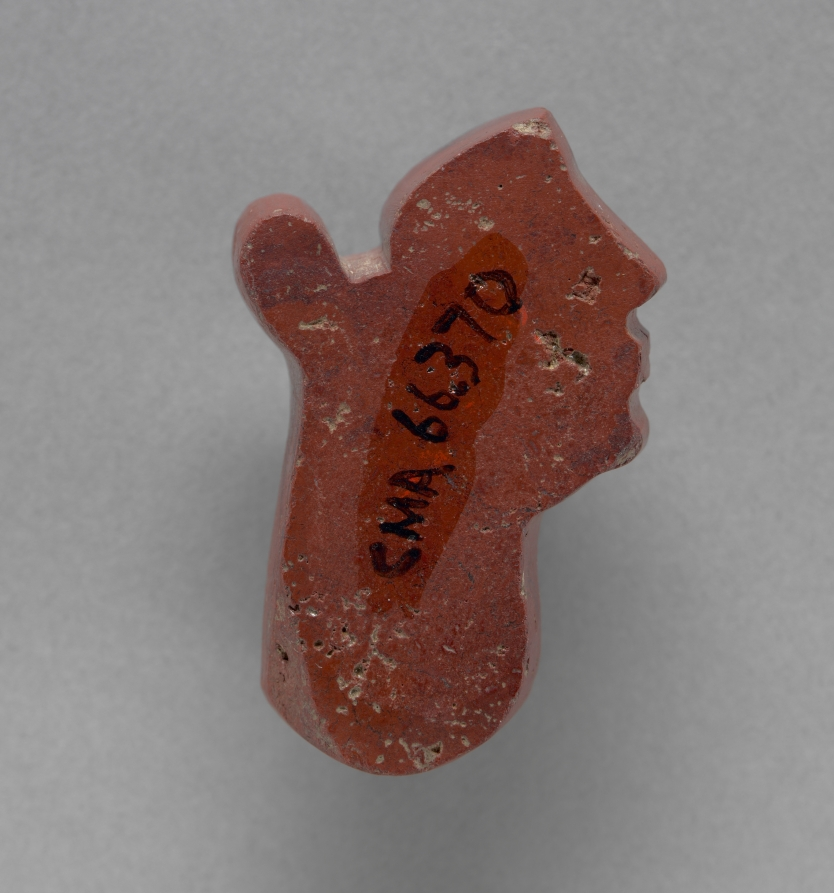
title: Inlay: Head of a King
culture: Egypt, Greco-Roman period (332 BCE–395 CE), Ptolemaic dynasty (305–30 BCE)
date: 380–246 BCE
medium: red jasper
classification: Inlays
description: This miniature carved stone profile depicts a left-facing Egyptian king. The inlay was once part of a larger scene, with a cutaway on the king’s head clearly leaving room for an Egyptian crown and the neckline for a traditional broad collar. It is skillfully carved and made from red jasper, a semiprecious stone. The naturalistic handling of the cheeks and mouth date this inlay to the Ptolemaic period. An inlay such as this would have been set into a chest, throne, or even a royal coffin.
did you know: Most Egyptian inlays are made of glass or faience, a type of ceramic, not precious or semiprecious stone like jasper.